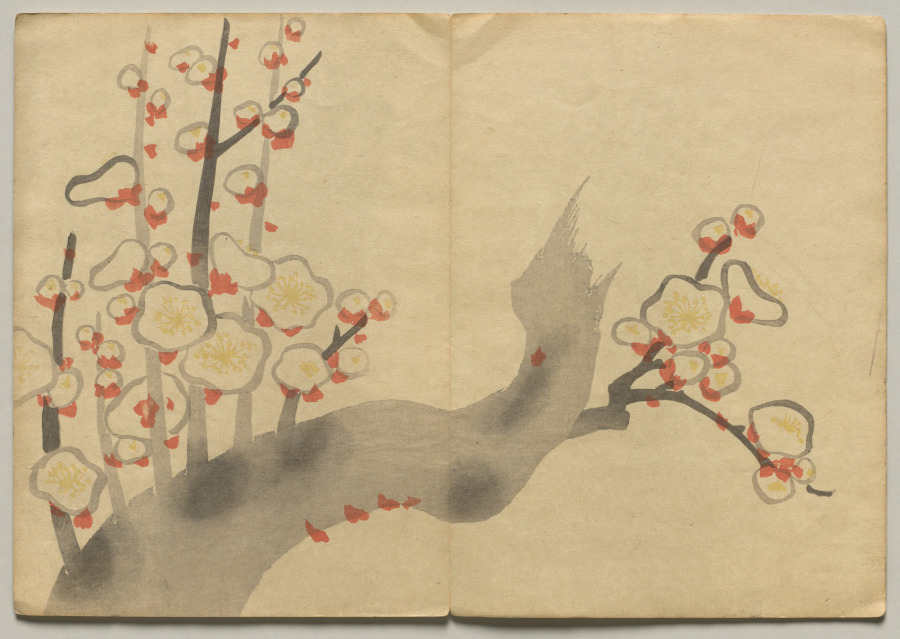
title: Scene from The Kōrin Picture Book (Volume 2)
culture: Japan, Edo period (1615–1868)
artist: Nakamura Hōchū (Japanese, d. 1819)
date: 1800s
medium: color woodblock printed book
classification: Bound Volume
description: Ogata Korin (1658-1716) was one of the most admired artists of Rimpa, or "decorative school painting." These books by the charming later-generation Rimpa artist Hochu record Korin's inventive designs.